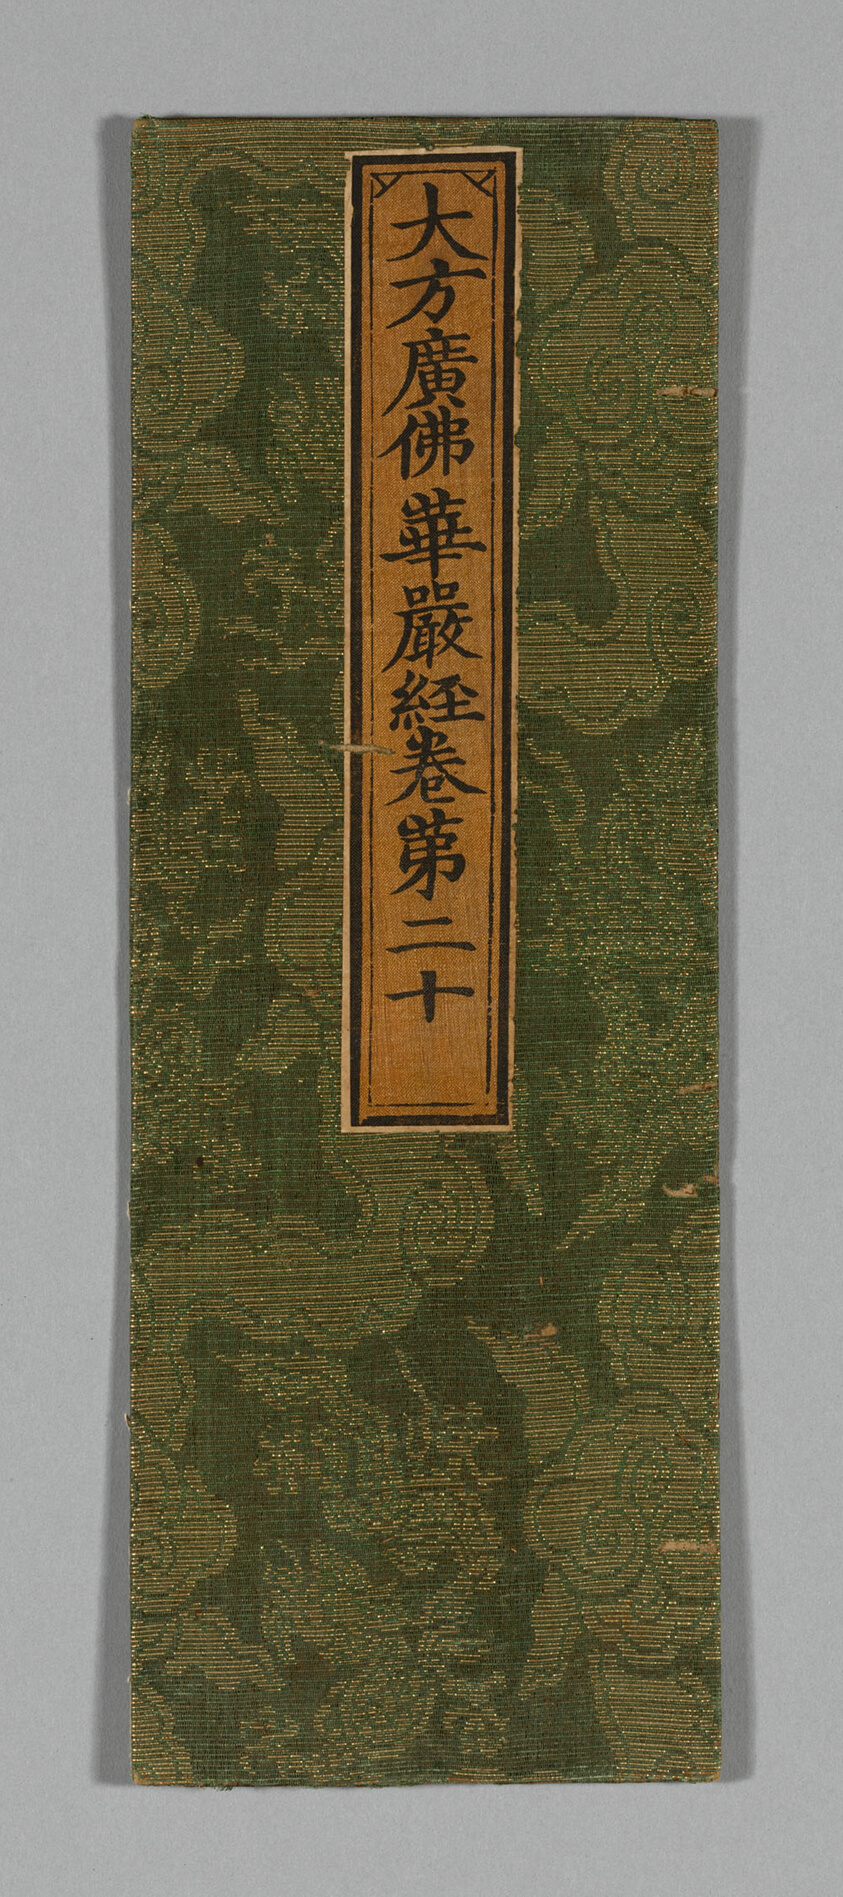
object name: Textile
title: Sutra Cover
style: ming, Chinese (culture or style), East Asian, asian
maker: China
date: Ming dynasty (1368–1644), c. 1590's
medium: Silk and gold-leaf-over-lacquered-paper strip, gauze weave with supplementary patterning wefts; label: silk, plain weave; painted with ink; over paper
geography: China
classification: textile; weaving